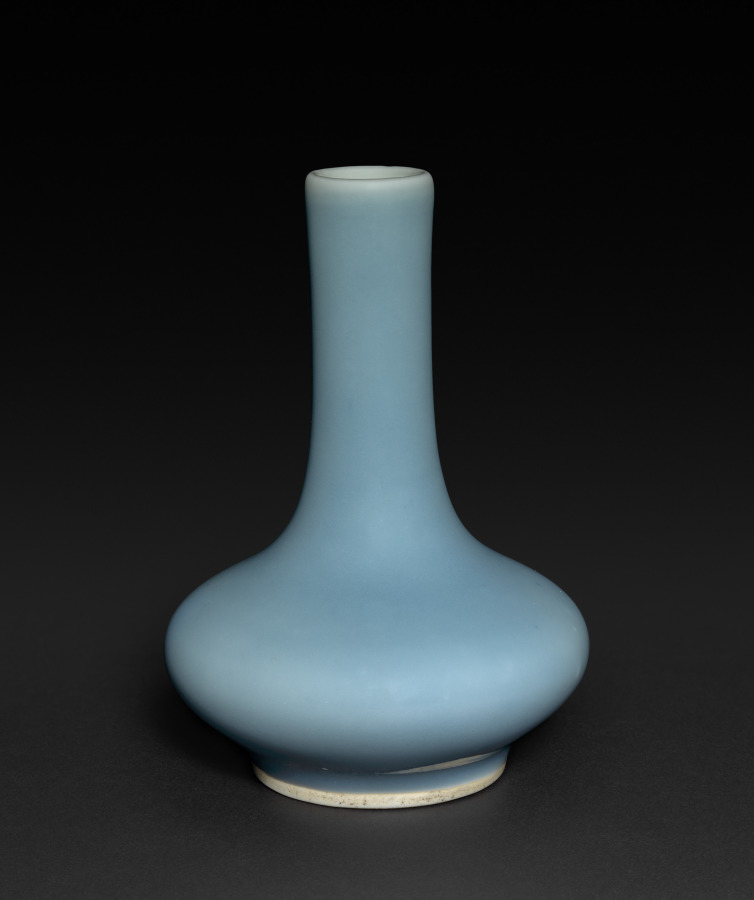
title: Bottle-Shaped Vase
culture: China, Qing dynasty (1644-1911), Kangxi reign (1661-1722)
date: 1661–1722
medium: porcelain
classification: Ceramic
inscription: 大清康熙年製